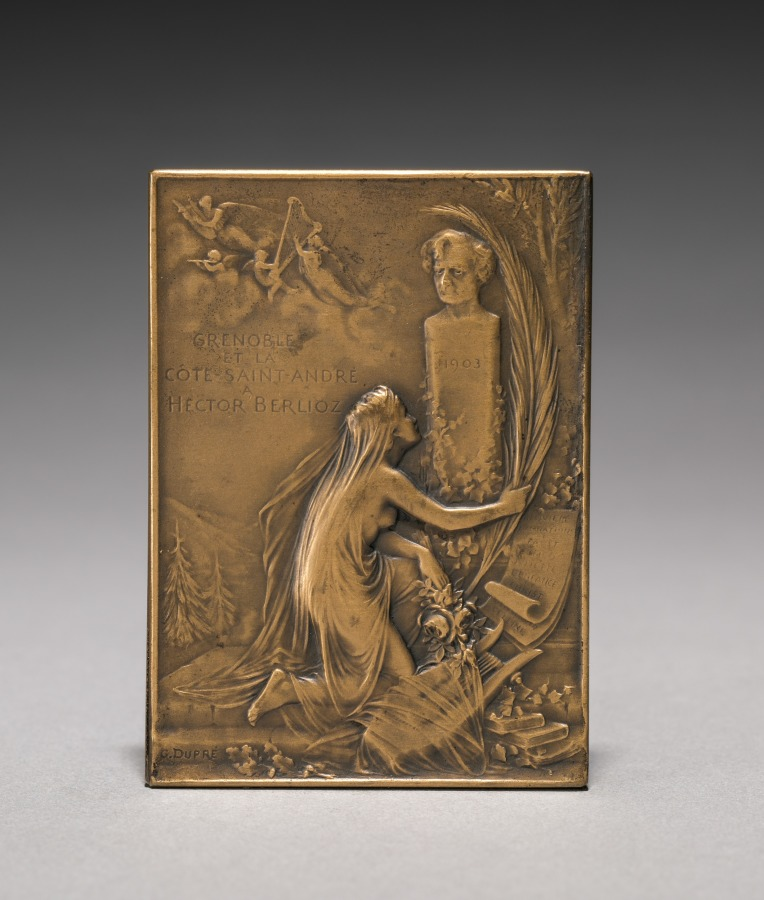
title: Medallion (reverse)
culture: France, early 20th century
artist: Jules Dupré (French, 1811–1889)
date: 1903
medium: bronze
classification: Metalwork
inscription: "Hector Berlioz 1803 - 1869; Les Troyens"; signed: "G. Dupré."